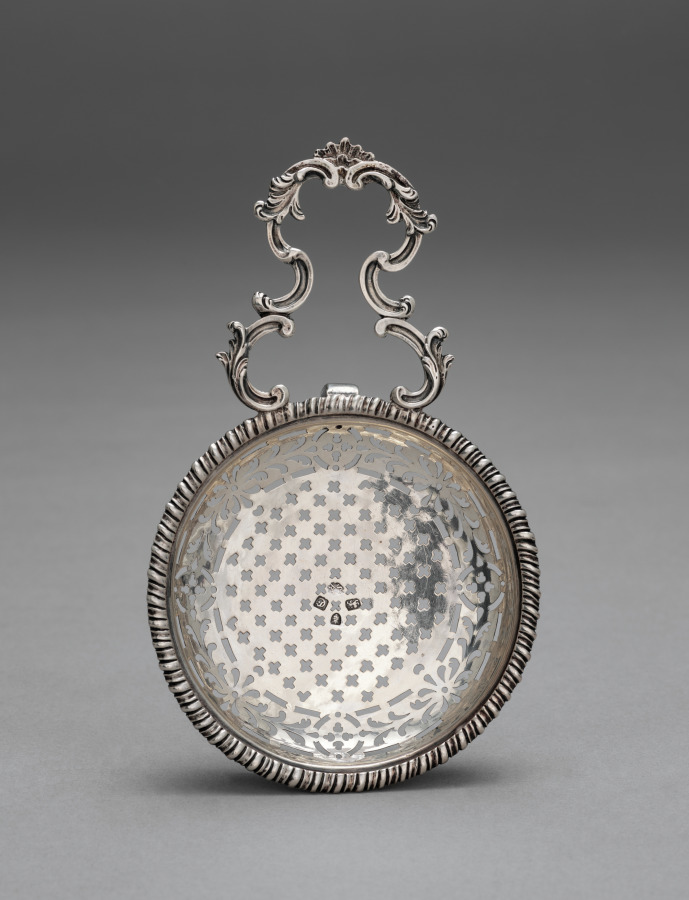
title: Strainer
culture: England, London, 18th century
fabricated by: Samuel Herbert (British)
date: 1760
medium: silver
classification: Silver